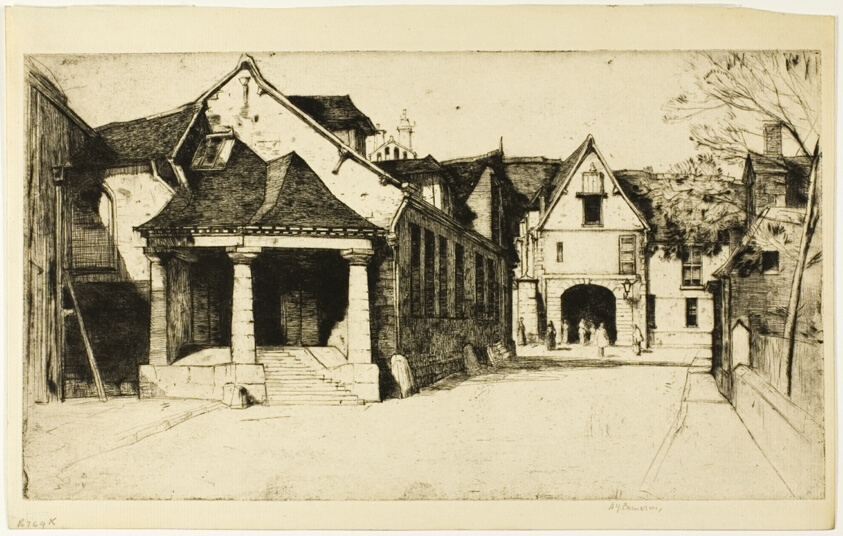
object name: Print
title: Old Museum, Beauvais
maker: David Young Cameron (Scottish, 1865-1945)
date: 1917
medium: Etching and drypoint on ivory laid paper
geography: Scotland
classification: etching; print; prints and drawing